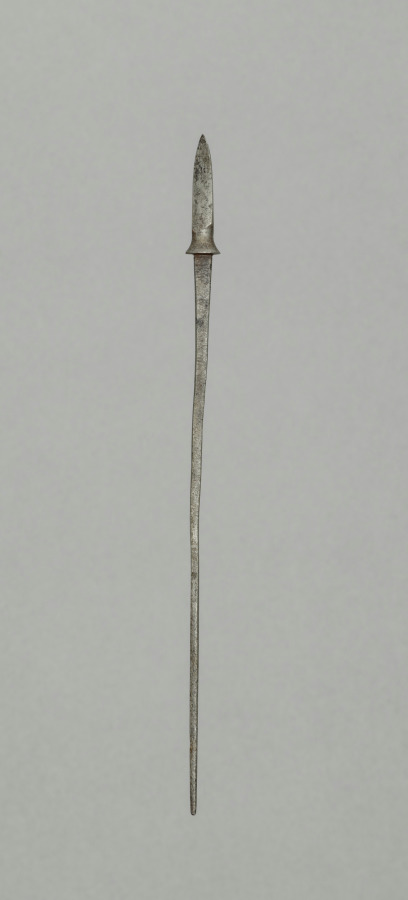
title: Arrow Point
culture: Japan, Edo period (1615–1868)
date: 1700s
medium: steel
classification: Arms and Armor